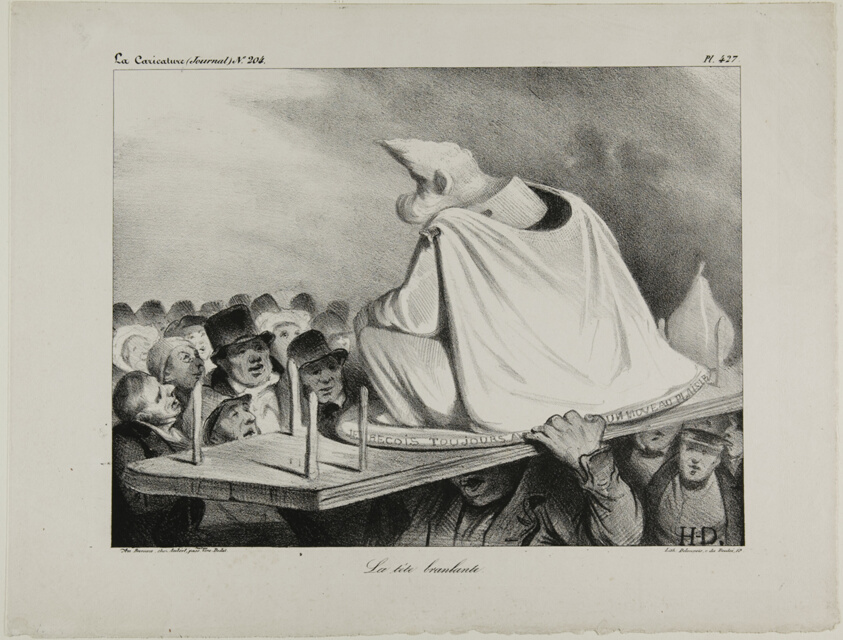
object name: Print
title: The Loose Head, plate 427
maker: Honoré Victorin Daumier; French, 1808-1879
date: 1834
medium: Lithograph in black on ivory wove paper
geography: France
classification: lithograph; print; prints and drawing